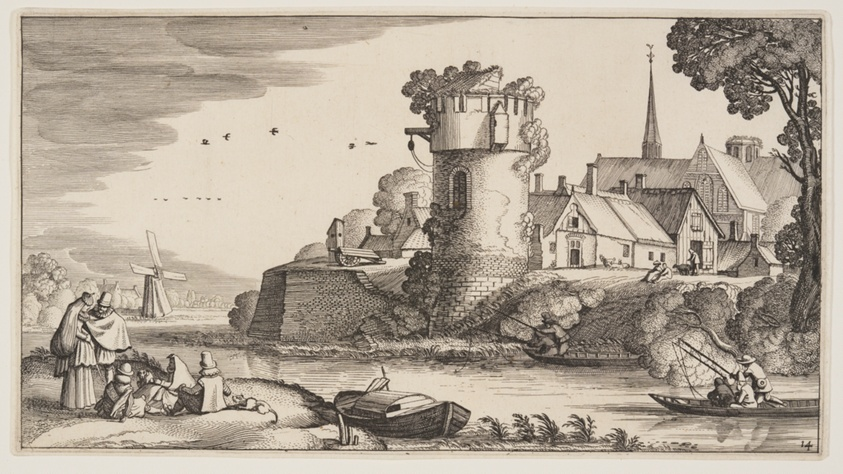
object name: Print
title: Watch-Tower by a River, from Landscapes (Playsante Lantschappen)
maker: Attributed to Claes Jansz. Visscher II (Dutch, 1586-1652); after Jan van de Velde II (Dutch, c. 1593-1641)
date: c. 1641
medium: Etching, with engraving, on ivory laid paper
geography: Netherlands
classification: etching; paper; print; prints and drawing